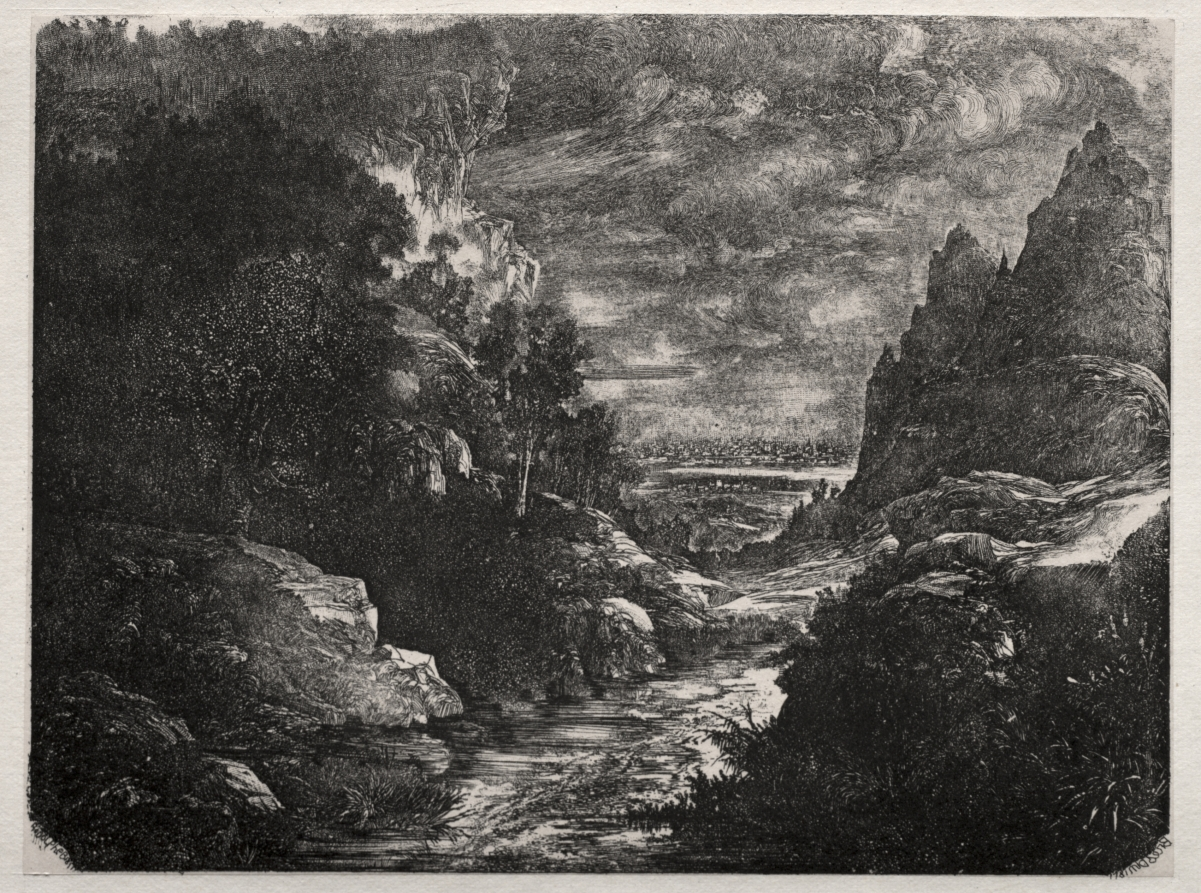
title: The Mountain Stream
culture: France, 19th century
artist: Rodolphe Bresdin (French, 1822–1885)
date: 1871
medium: lithograph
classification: Print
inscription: lower left corner, in stone: RoDolphe B 1871; lower right corner, in stone: BresDin 1871